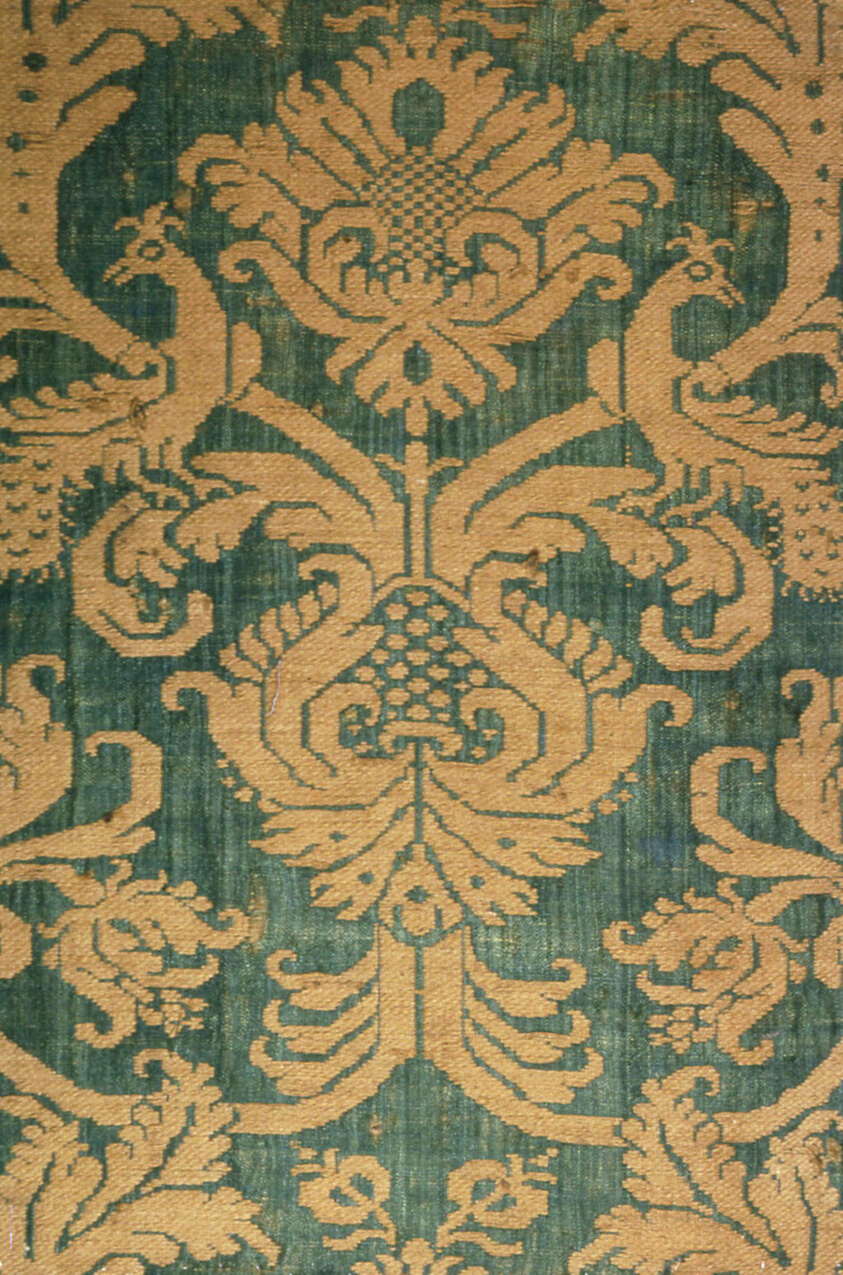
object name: Textile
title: Fragment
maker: Italy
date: 1600/50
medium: silk, double compound cloth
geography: Italy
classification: textile; weaving